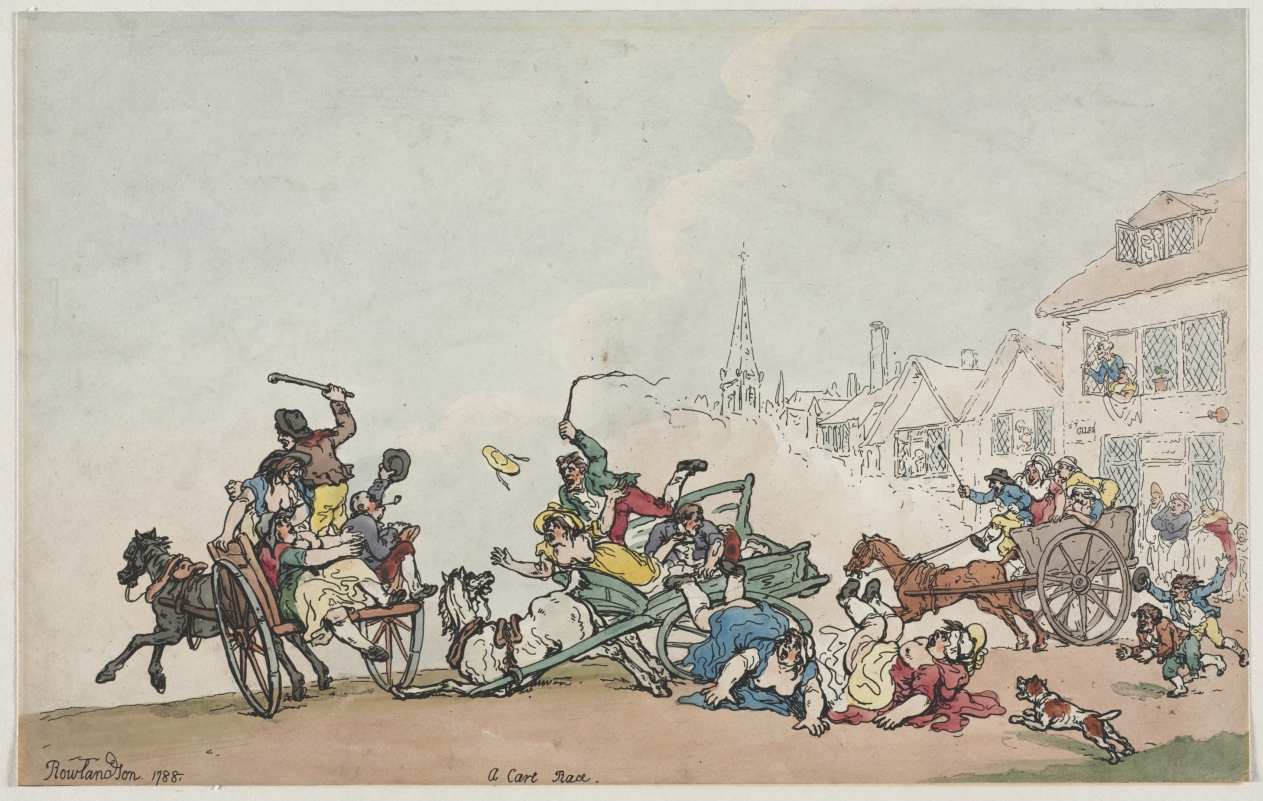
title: A Cart Race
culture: England, 18th century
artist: after Thomas Rowlandson (British, 1756–1827)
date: 1788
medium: etching and aquatint, hand colored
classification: Print